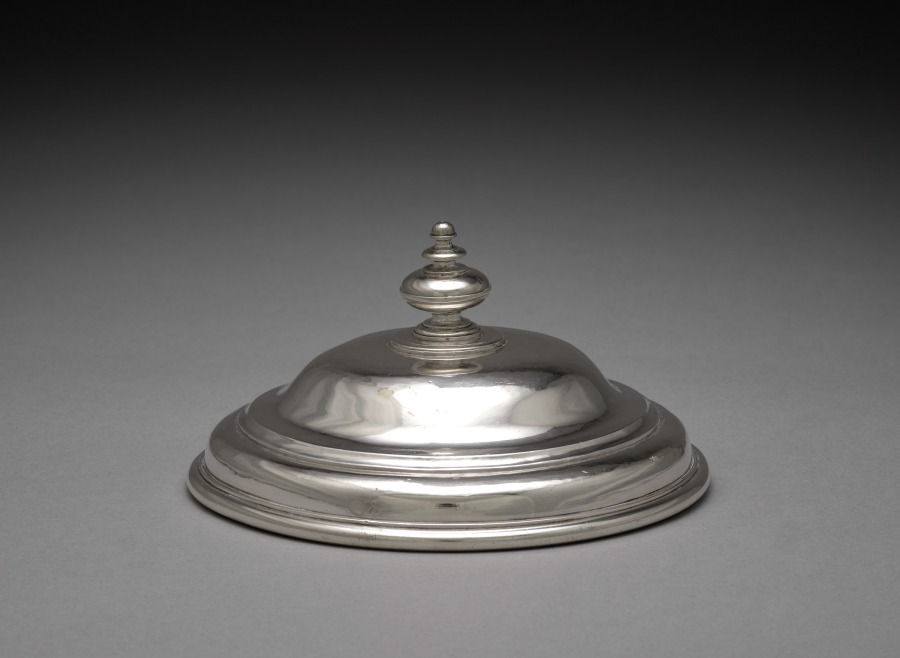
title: Two-Handled Cup (lid)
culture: England, London, 18th century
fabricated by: Anthony Nelme (British)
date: 1712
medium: silver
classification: Silver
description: Nelme was one of the most famous and successful native English silversmiths of a time when Huguenots (French Protestants) dominated the creation of richly decorated pieces for the most fashionable market.